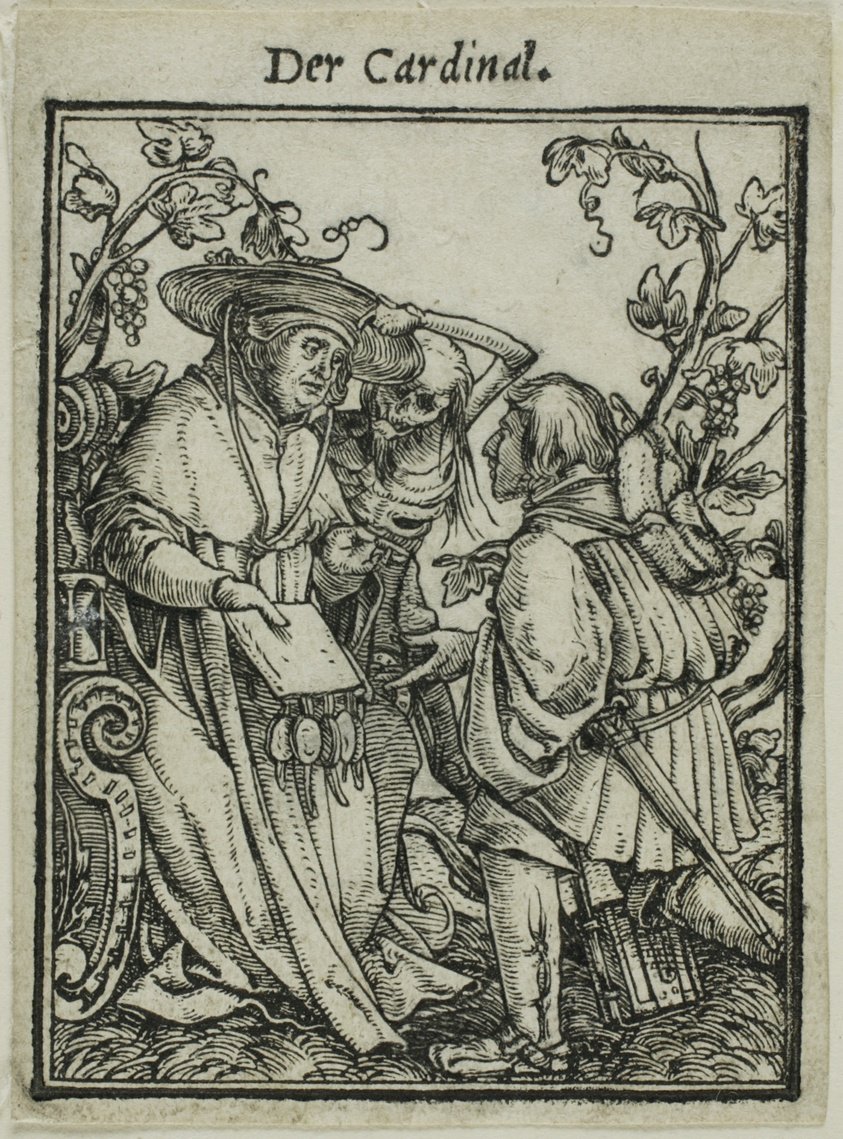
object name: Print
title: The Cardinal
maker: Hans Holbein, the younger (German, 1497-1543)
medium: Woodcut on paper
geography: Germany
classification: woodcut; print; prints and drawing